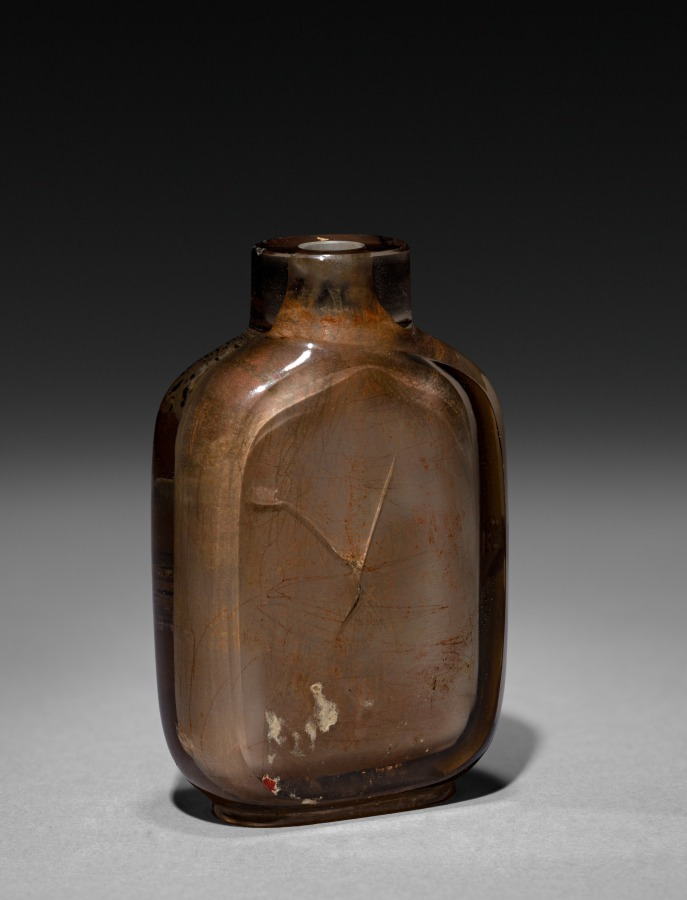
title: Snuff Bottle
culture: China, Qing dynasty (1644-1911)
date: 1644–1911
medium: glass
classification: Glass